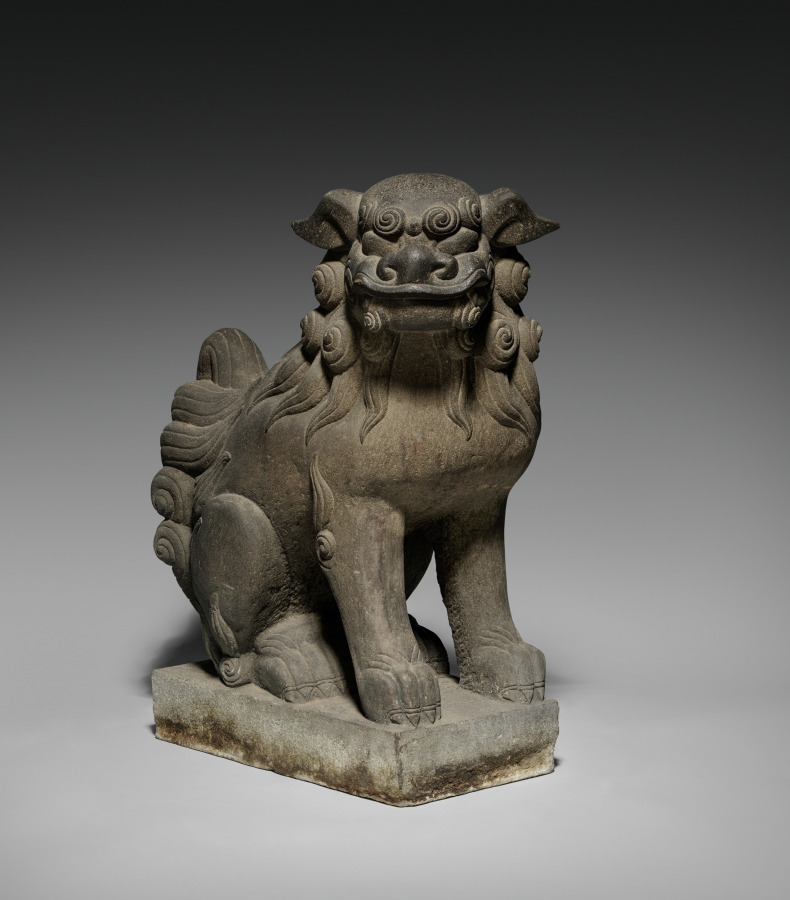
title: Lion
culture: Japan?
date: c. 1800s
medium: gray schist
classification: Sculpture